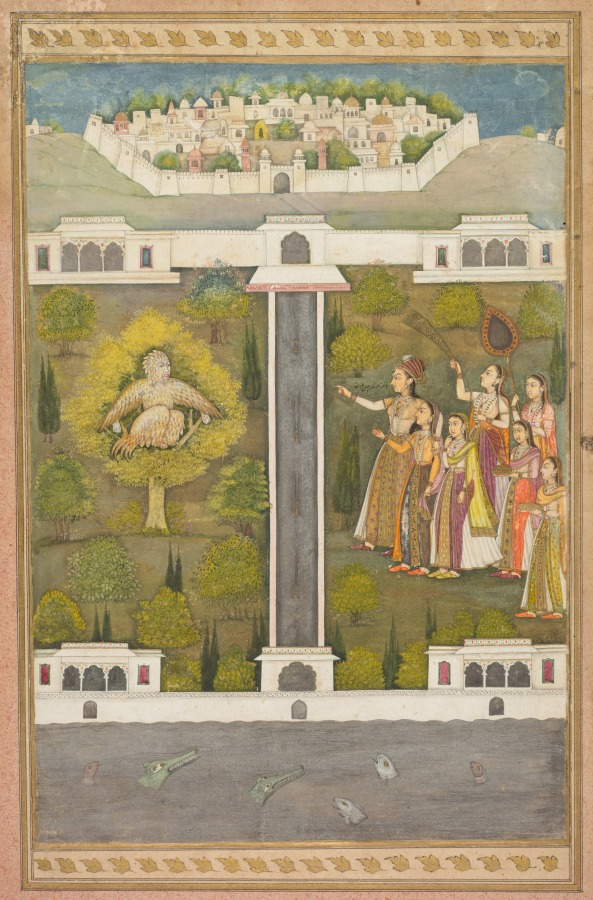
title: Mahliqa, Daughter of the Emperor of China, Pointing at the Bird-Man Khwaja Mubarak: A Leaf from a Poetical Romance Relating to Shah Alam I (verso); Stenciled Scenes of Lion and Gazelle (verso)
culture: Mughal India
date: c. 1710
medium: Gum tempera, ink, and gold on paper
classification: Painting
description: A Persian inscription identifies the bird-man in the tree by name, but the text in which he appears remains unidentified. Also unknown is the Chinese princess Mahliqa (“she who has a face like the moon”), named in a Persian inscription written in front of her face. The artist depicts her in the dress of a Mughal court lady, except for the addition of an unusual headdress, and her handmaidens all look Indian. They gesture to the bird-man from the opposite side of a formal garden canal with fountains. A fortified city lies in the distance behind the walled garden, while creatures peer up at the fabulous composite figure from the water below.